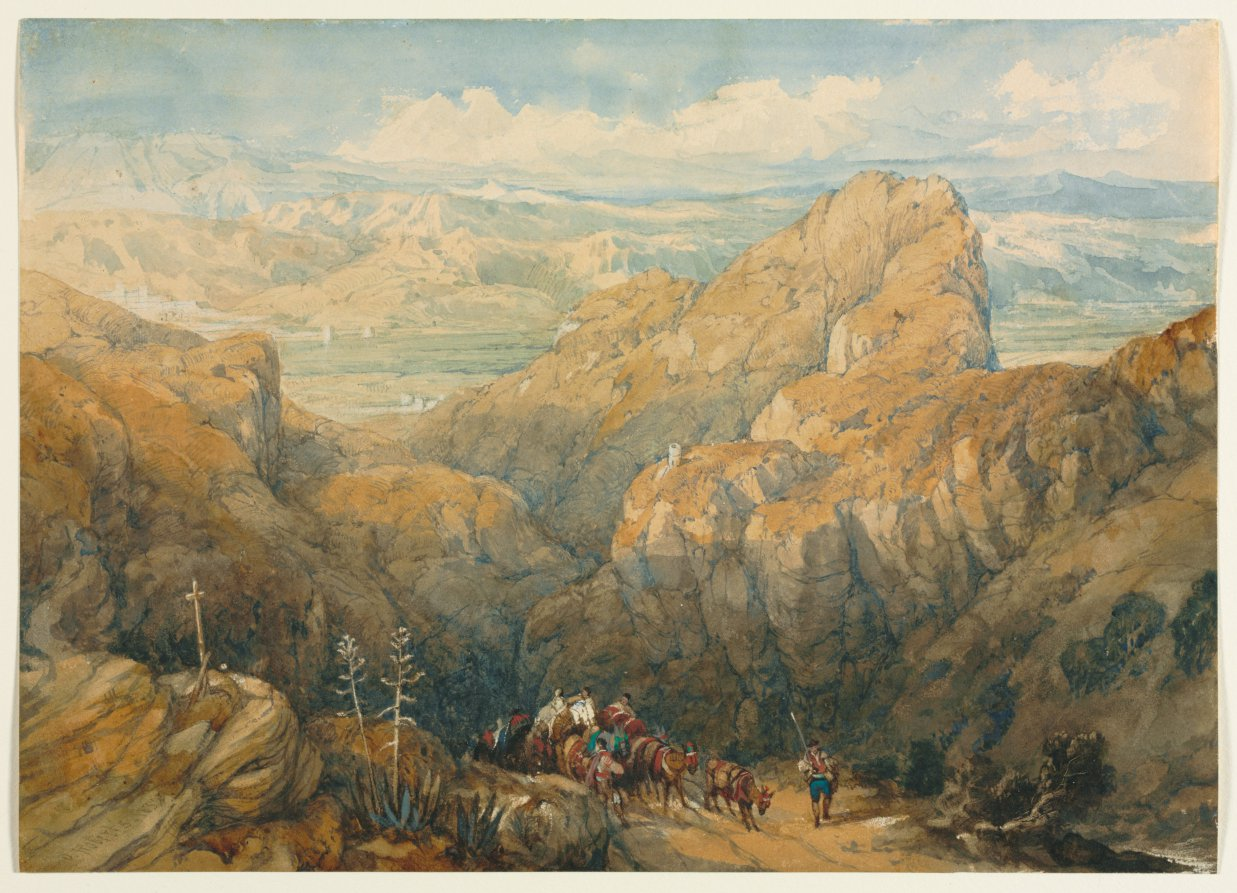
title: Descent into the Plain of Granada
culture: England, 19th century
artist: David Roberts (Scottish, 1796–1864)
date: 1834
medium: watercolor with gouache, scratch-away, and graphite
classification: Drawing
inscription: signed and dated, in brown watercolor, at lower left: D. Roberts 1834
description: Later celebrated for his topographical landscapes of the Middle East, David Roberts’s first extended trip abroad was in 1832 when he traveled through France to Spain over a period of 10 months. This watercolor records a scene from Roberts’s journey from Madrid to Andalusia. He described the trip in a letter to his sister: "I jogged on a considerable part of the way on foot, happy and contented. Granada is in the most beautiful situation that can be imagined. It lies at the foot of a ridge of high mountains, called the Sierra Nevada, or the Mountains of Snow." Replete with burdened mules, a lone figure on foot, and sun-drenched mountains with a view of Granada in the distance, this watercolor vividly illustrates the artist’s recollections.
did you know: This drawing was reproduced as a wood engraving in Roscoe's first volume, The Tourist in Spain: Granada.